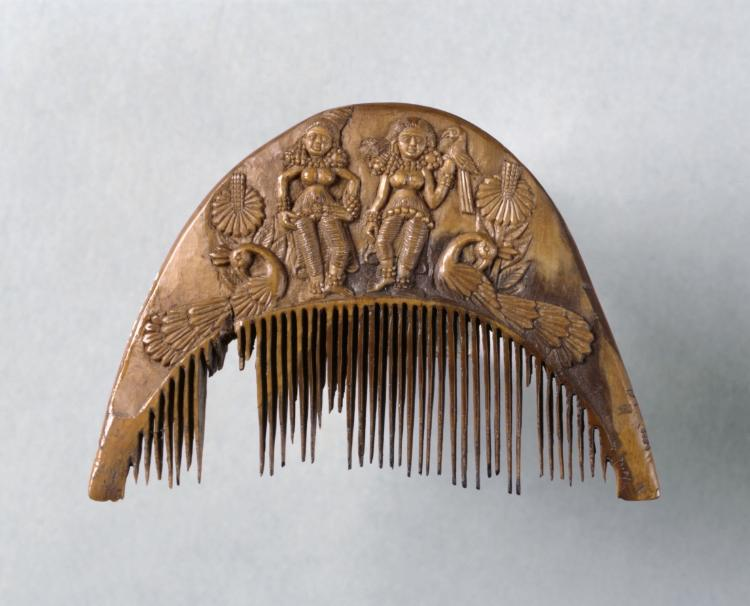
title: Comb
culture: India, Bengal, Chandraketugarh area, Shunga period (185–78 BCE)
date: 200 BCE–100 CE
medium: ivory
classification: Ivory